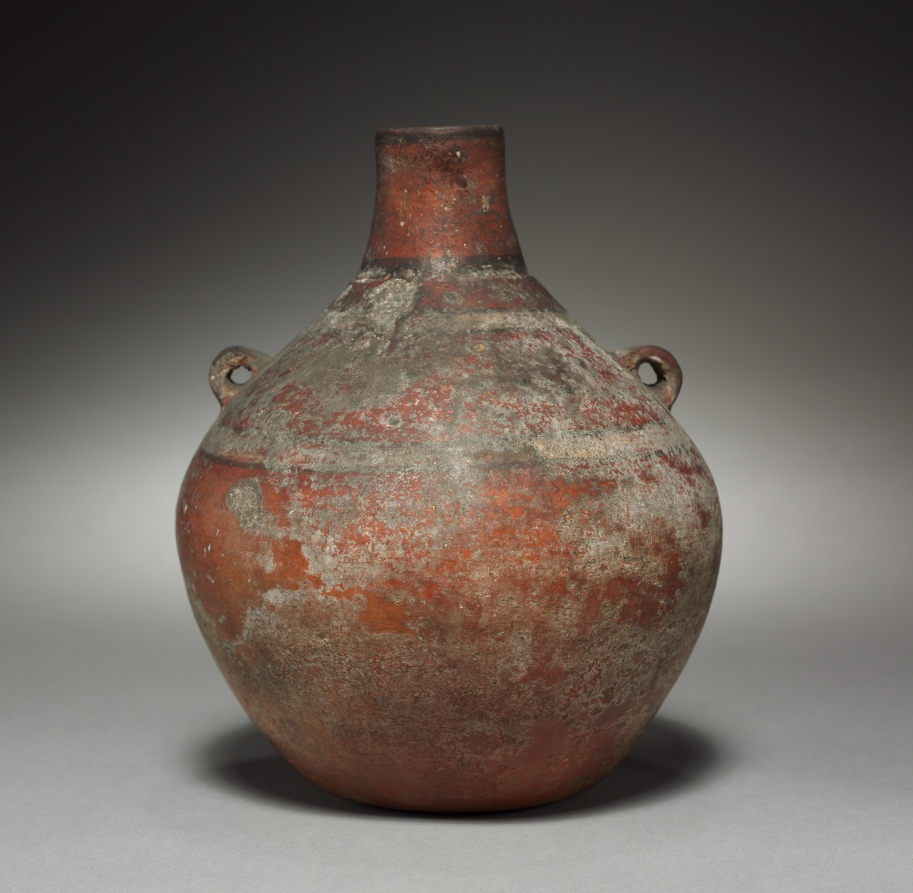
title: Bottle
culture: Peru, Pachacamac, Tiwanaku style, 400-1000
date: 400–1000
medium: pottery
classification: Ceramic